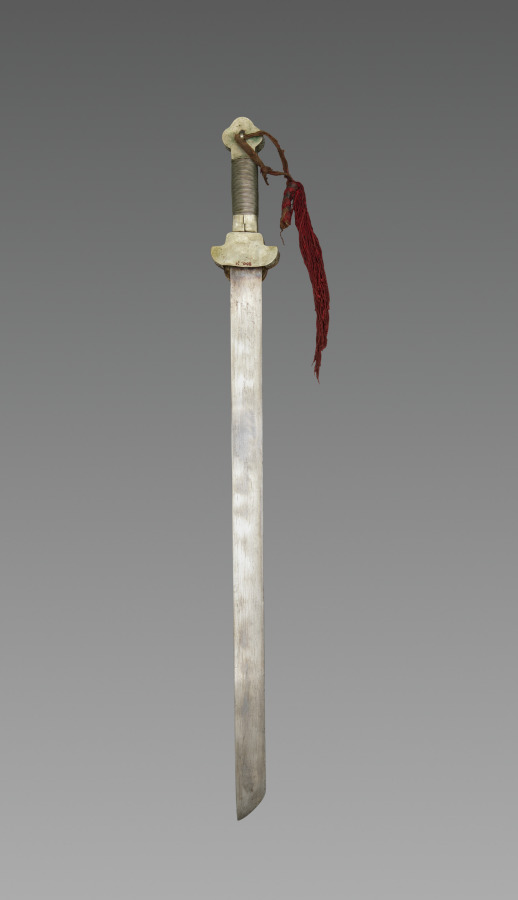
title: Sword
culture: Tibet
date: 1800s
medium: iron and silver with bone, turquoise, leather and brass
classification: Arms and Armor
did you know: There is a cutting edge only on one side.